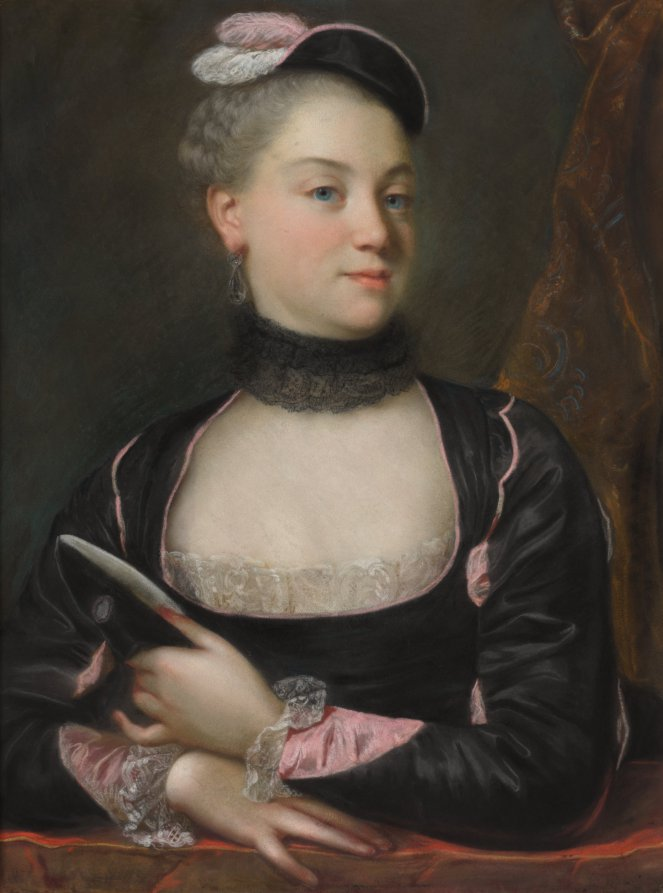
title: Portrait of a French Actress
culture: France, 18th century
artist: attributed to Jacques-Charles Allais (French, c. 1704-c. 1759)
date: c. 1746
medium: pastel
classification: Drawing